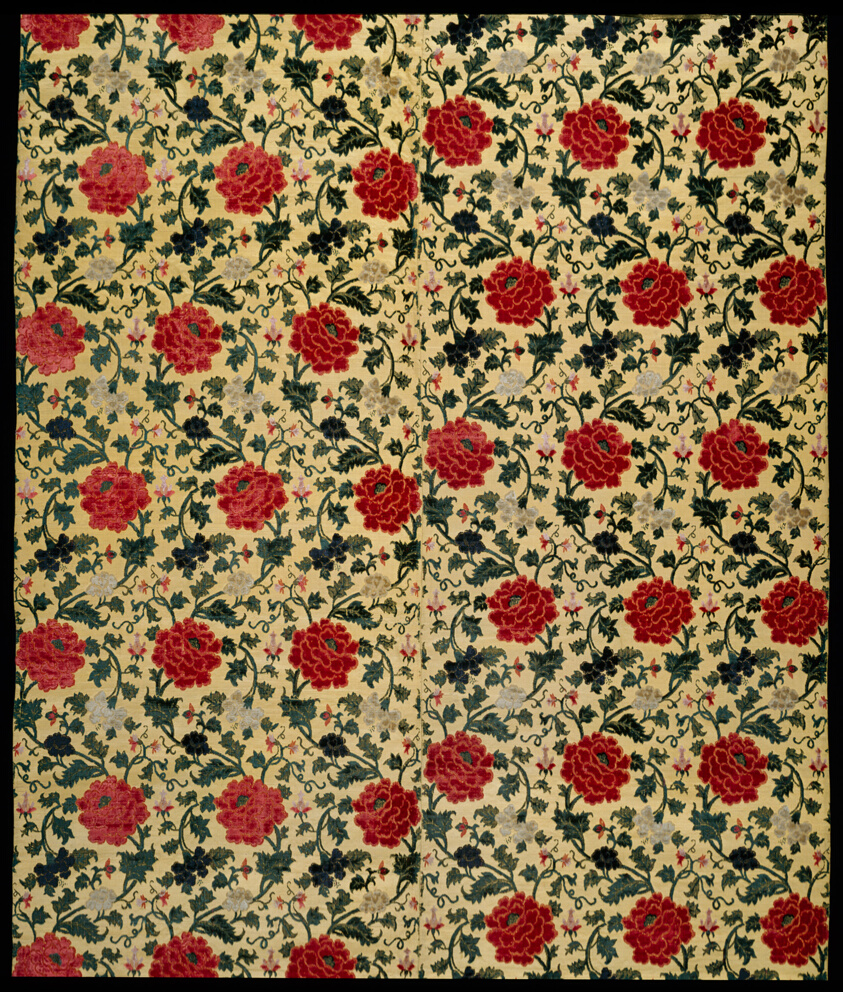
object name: Textile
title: Panel (Furnishing Fabric)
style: qing, Chinese (culture or style), East Asian, asian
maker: Manchu (China)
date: Qing dynasty (1644–1911), 1750/1800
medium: Silk, warp-float faced 5:1 satin weave with supplementary pile warps forming cut and uncut voided velvet; two panels joined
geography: China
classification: textile; weaving - velvet; furnishing textile